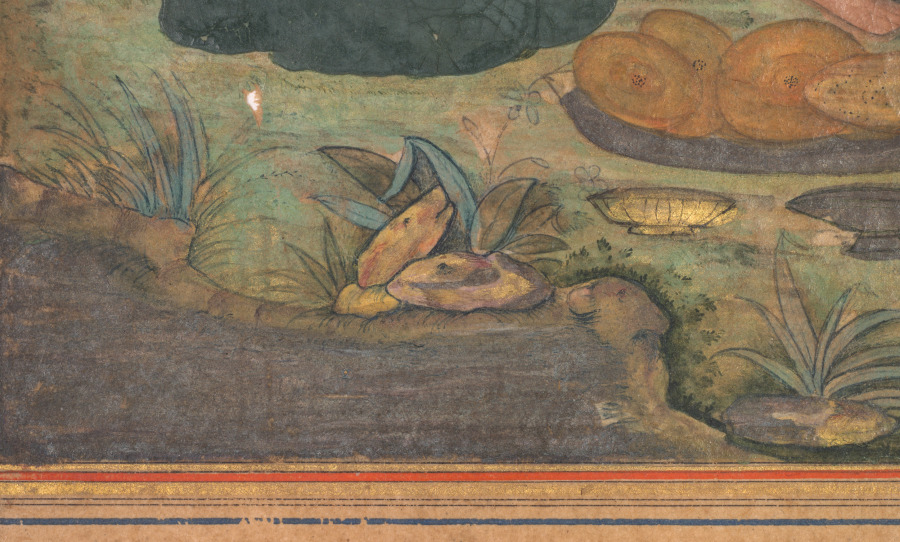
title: Angels bring food to Jesus in the wilderness (folio 55 recto), from a Mirror of Holiness (Mir’at al-quds) of Father Jerome Xavier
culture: Mughal India, Allahabad, made for Prince Salim (1569–1627)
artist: Muhammad Sharif (Indian, active c. 1600)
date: 1602–4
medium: Gum tempera, ink, color, and gold on paper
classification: Manuscript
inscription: Signature of the artist, Muhammad Sharif (Indian, active c. 1600), is written in the tiny pot by Jesus's foot.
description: To end his 40-day fast, five angels brought Jesus refreshments from heaven: breads, melons each with a knife for convenient cutting, fresh leeks, and what appear to be fragrant rice dishes and curries, along with cups of wine. Four of the angels are dressed in robes, and one is clothed only in feathers. After his baptism, Jesus spent 40 days and nights in the desert where he fasted, practiced spiritual exercises, and successfully resisted the temptations of Satan. Many of the rocks in this painting have faces, called grotesques. This page is the only surviving folio from this manuscript that has an artist’s signature, written in the tiny pot by Jesus’s foot.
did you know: The artist has put faces in the rocks, following a Persian convention.